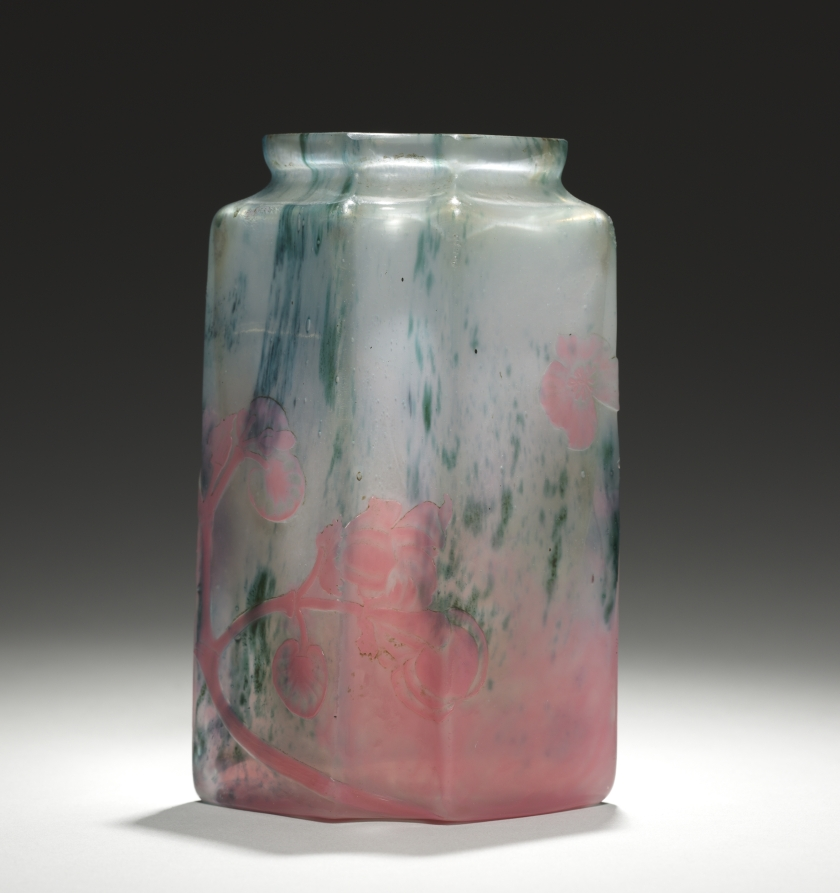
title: Vase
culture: France, early 20th Century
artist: Emile Gallé (French, 1846–1904)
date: c. 1900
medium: glass with pink and green inclusions, cameo cut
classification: Glass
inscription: inscribed in Japanese style, lower right: Gallé.